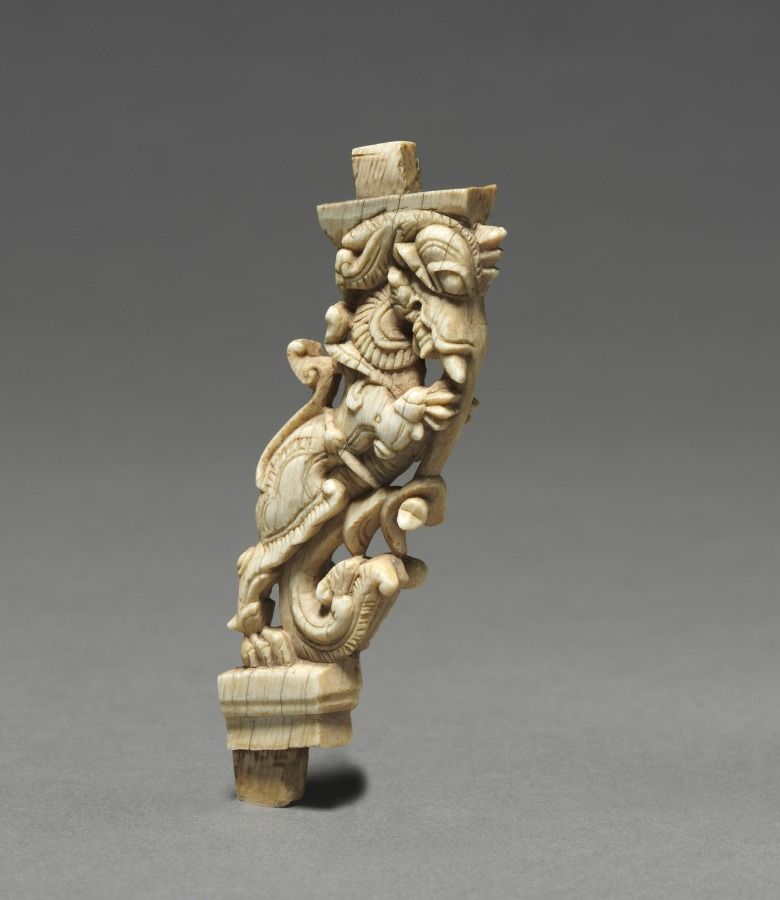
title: Carved Brackets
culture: South India, probably Madurai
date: 1600s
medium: Ivory with traces of pigment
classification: Ivory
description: Composite creatures with the body of a lion, tusks and trunk of an elephant, and horns of an antelope are standard elements of medieval Indian architecture and furniture. Traces of pigment indicate that these ivory furniture facings were brightly painted.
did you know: In India ivory has been used to face wooden furniture for more than two thousand years.